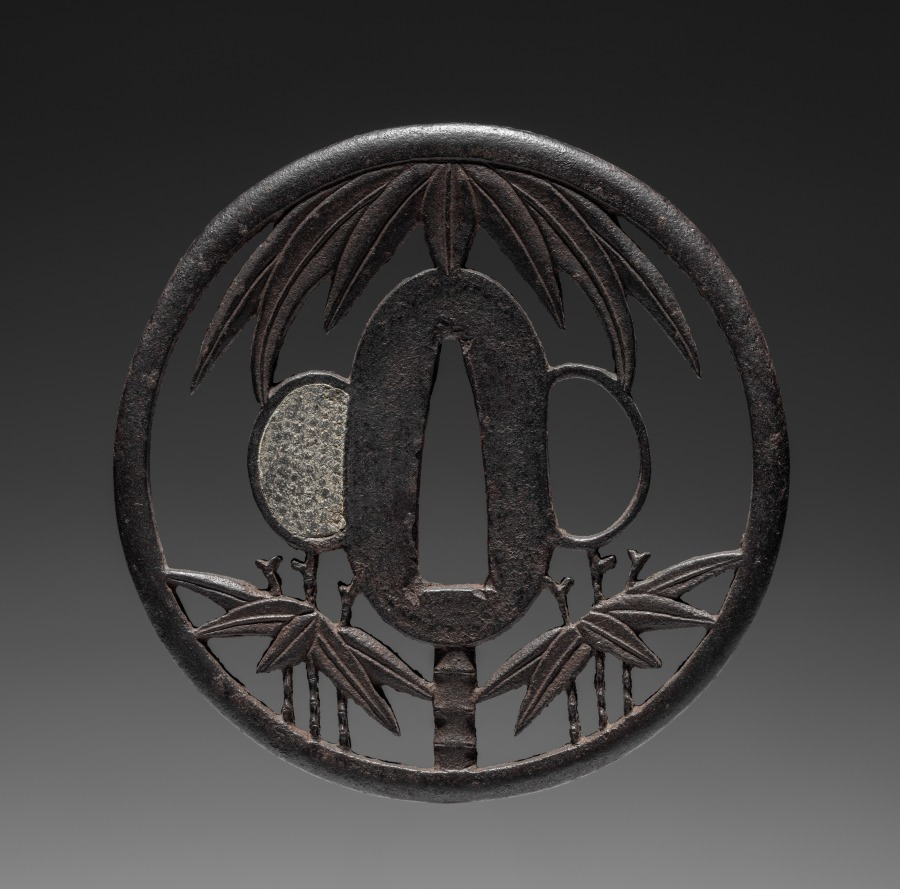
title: Sword Guard (Tsuba) with Bamboo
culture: Japan, possibly Edo period (1615-1868)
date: c. 1615–1868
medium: iron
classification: Arms and Armor